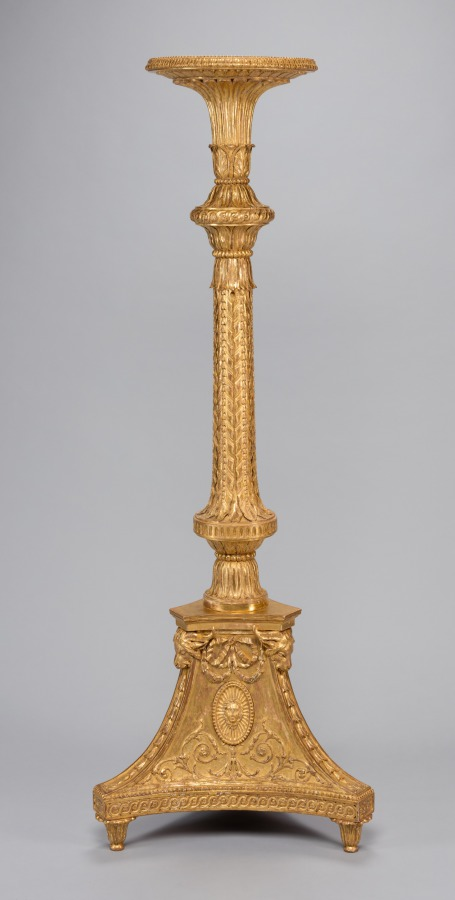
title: Candle Stand (torchère) (1 of 2)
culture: England, 18th century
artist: Thomas Chippendale (British, 1718–1779)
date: c. 1773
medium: Gilt-wood, gesso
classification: Furniture and woodwork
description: This gilded candle stand was made by Thomas Chippendale, the most renowned cabinetmaker in eighteenth-century London, for the grand drawing room of Brocket Hall, a large country house in Hertfordshire, England. With finely carved acanthus leaves, swags, fluting, and oval masks depicting the Roman goddess Diana, this candle stand exhibits Chippendale’s masterful understanding of neoclassical proportion, scale, and ornament. His landmark book of furniture designs, The Gentleman and Cabinet-Maker’s Director (first published in 1754), was highly admired as a source of inspiration by cabinetmakers and architects around England as well as in Europe and America.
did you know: Candle stands usually held silver or crystal candelabra that were lit for evening entertainment.